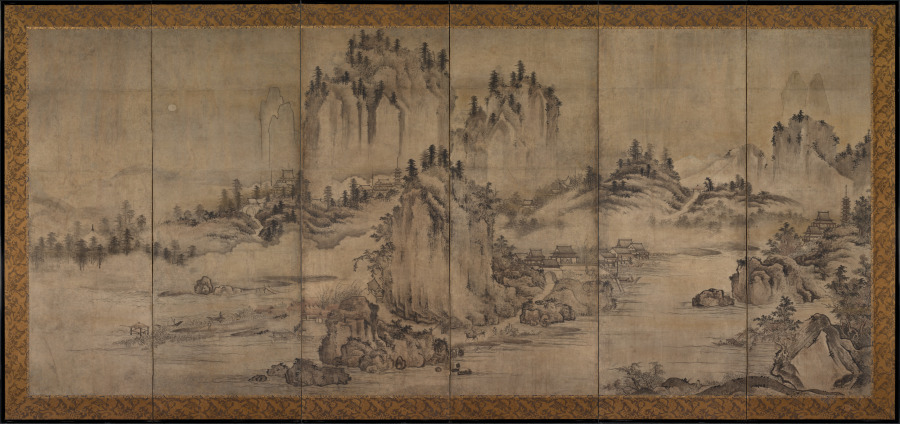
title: Landscape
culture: Japan, Muromachi period (1392–1573)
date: 1550–99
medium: Pair of six-panel folding screens; ink and color on paper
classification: Painting